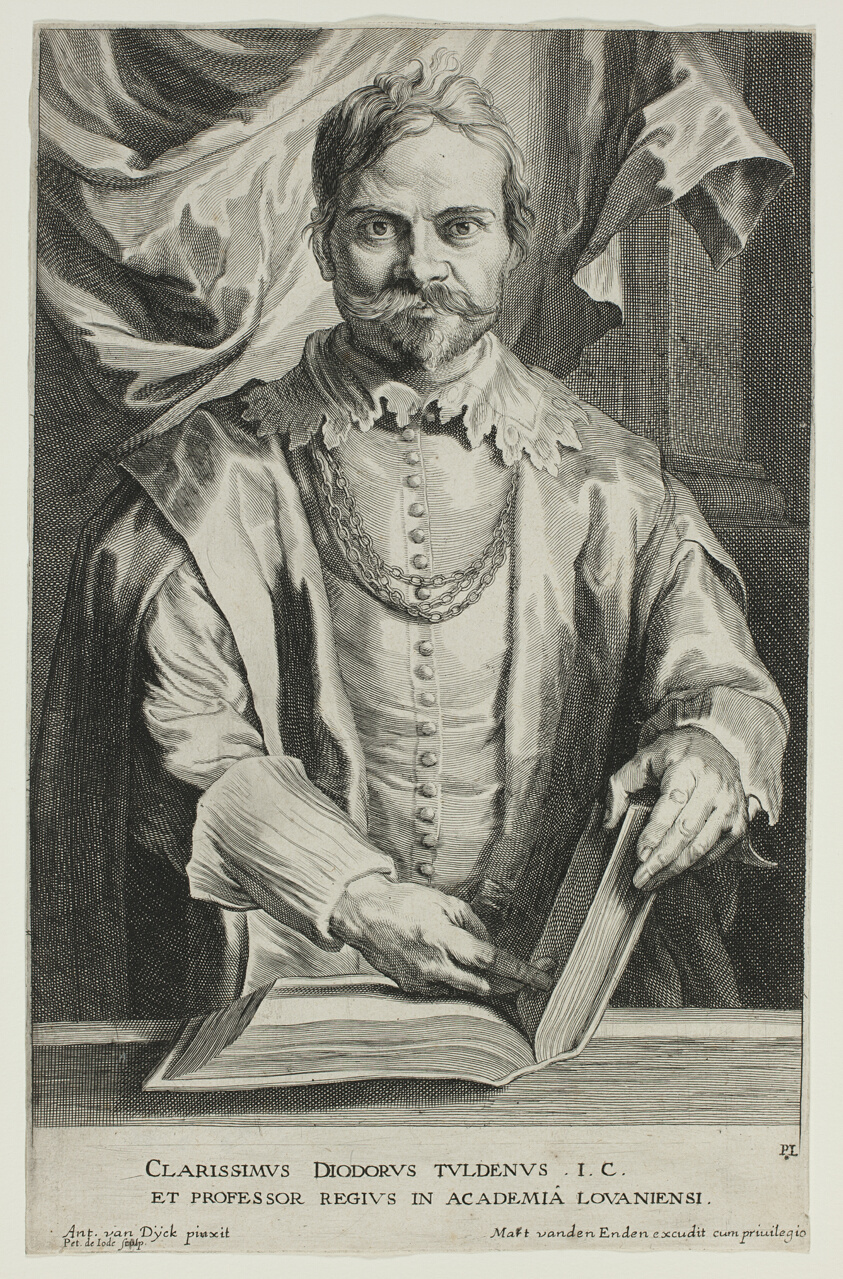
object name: Print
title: Theodore van Tulden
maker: Pieter de Jode II (Flemish, 1606–c. 1674); after Anthony van Dyck (Flemish, 1599–1641)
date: 1630/45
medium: Engraving with etching in black on ivory laid paper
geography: Flanders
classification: engraving; paper; print; prints and drawing